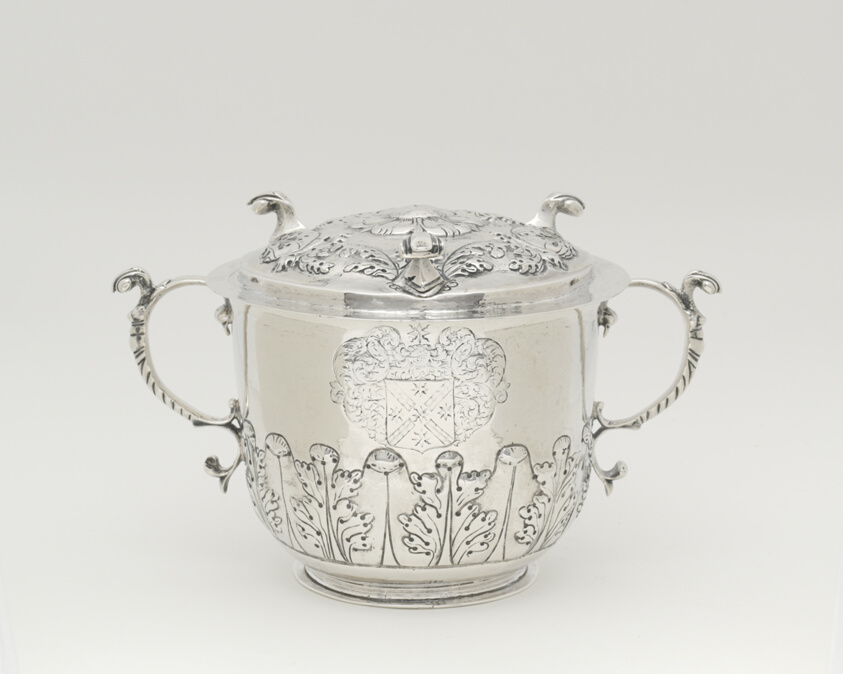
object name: Metalwork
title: Two-Handled Covered Cup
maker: Cornelius Kierstede; American, 1674–1757; New York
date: 1698–1720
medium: Silver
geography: New York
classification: drinking vessel; silver; american decorative arts; american arts; decorative arts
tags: servingware, floral, heirlooms, plant-derived motif, dining, drinking